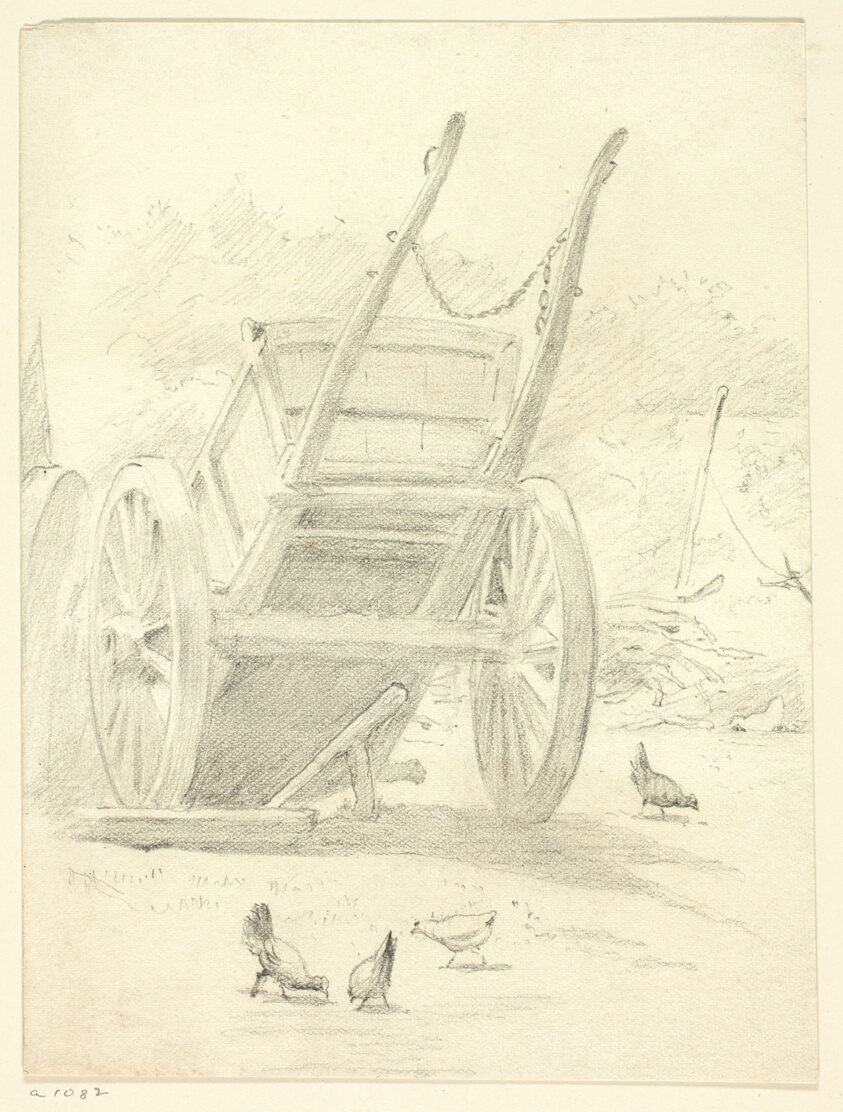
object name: Drawing and Watercolor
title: Wagon and Poultry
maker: Henry Stacy Marks (English, 1829-1898)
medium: Graphite on cream wove paper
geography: England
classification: graphite; drawings (visual works); prints and drawing